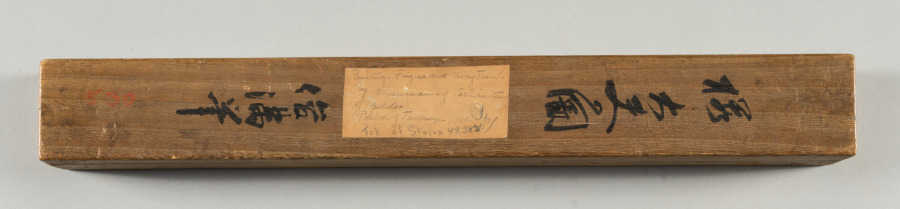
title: Woman and Two Children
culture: Japan, Meiji period (1868–1912)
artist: copy after Kubo Shunman (Japanese, 1757–1820)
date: early 1900s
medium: hanging scroll; color and gold on silk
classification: Painting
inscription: signed Kubo Shunman